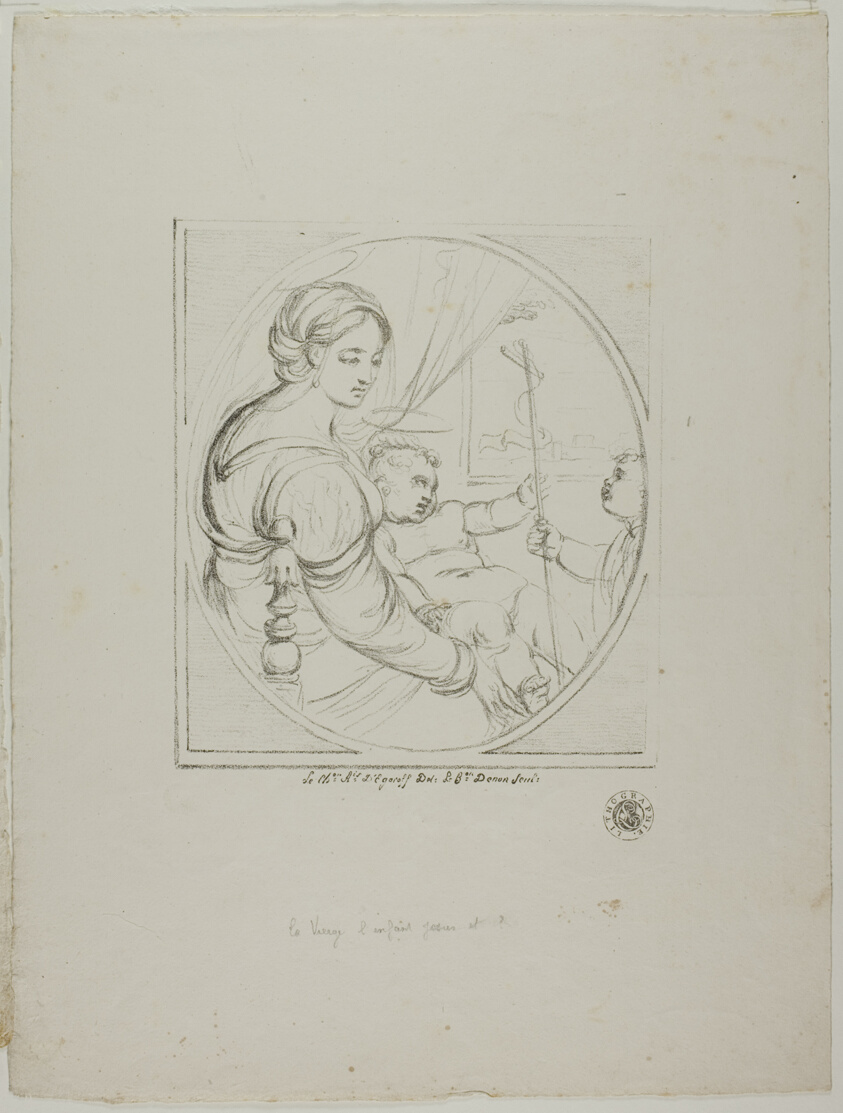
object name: Print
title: Virgin in a Chair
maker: Dominique-Vivant Denon (French, 1747-1825); after Alexis d'Egaroff (French, 18th-19th centuries)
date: 1817–20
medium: Lithograph in black on ivory wove paper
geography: France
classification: lithograph; print; prints and drawing